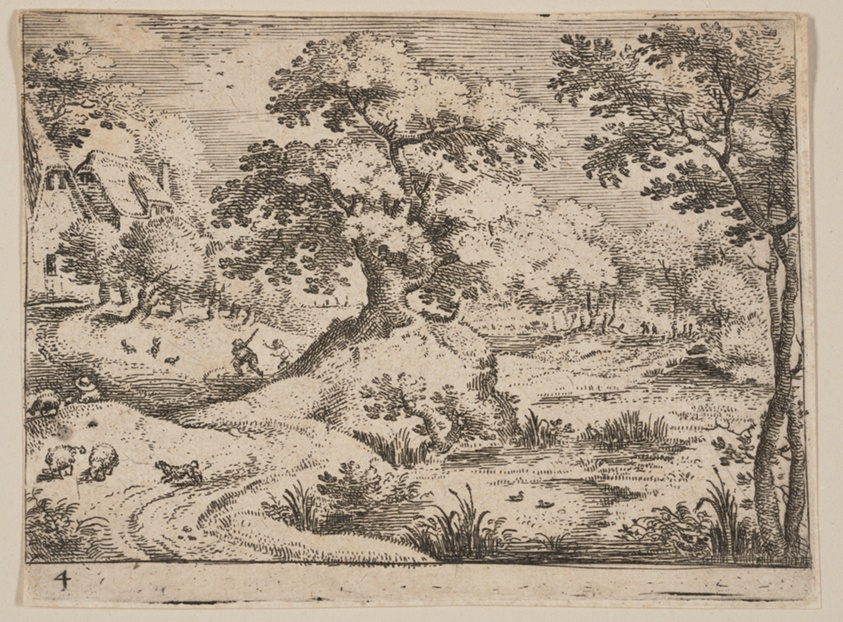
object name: Print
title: Path by a Swamp: Sheepdog and Sheep, from Landscapes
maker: Jacob Savery; Flemish, 1566–1603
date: c. 1595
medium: Etching on ivory laid paper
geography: Flanders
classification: etching; paper; print; prints and drawing